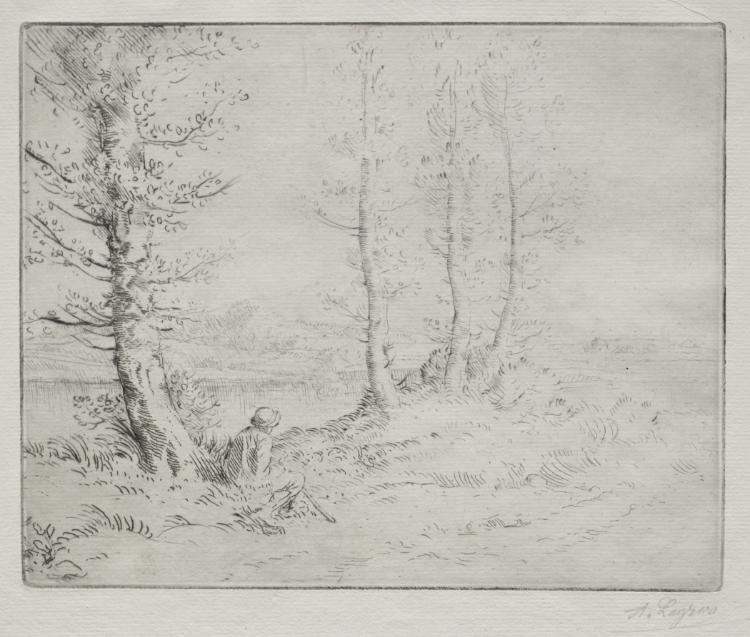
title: Le long de la rive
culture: France, 19th-20th century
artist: Alphonse Legros (French, 1837–1911)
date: c. 1857–1911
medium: etching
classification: Print